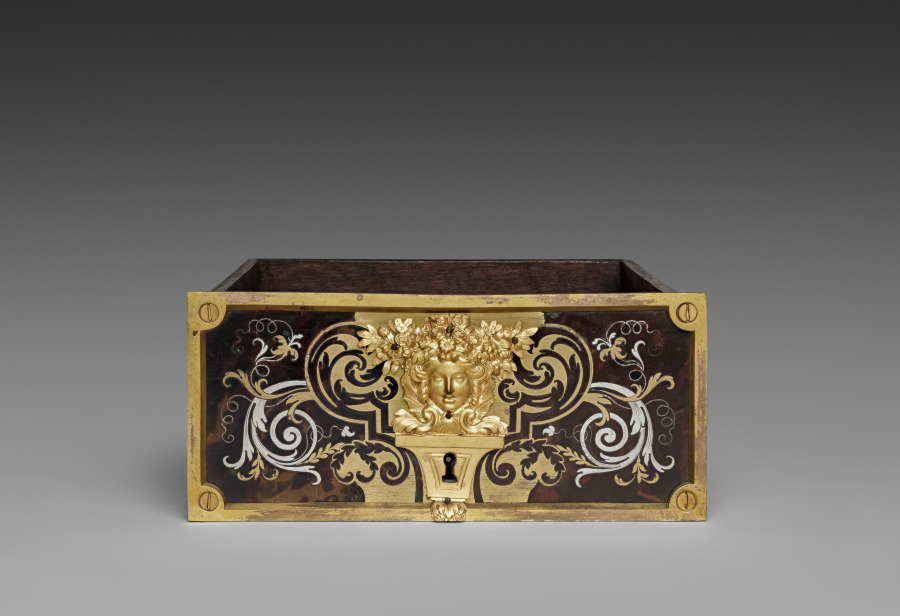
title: Side Drawer for Cabinet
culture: France, late 17th Century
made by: André-Charles Boulle (French, 1642–1732)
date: c. 1690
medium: ebony, marquetry in metal and tortoise shell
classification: Furniture and woodwork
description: Appointed cabinetmaker to King Louis XIV in 1672, André-Charles Boulle became a master of furniture making in France during the late 1600s until his death in 1732. Known primarily for his use of marquetry, in which metal patterns are inlaid into tortoiseshell then applied within the veneered surface of the furniture, Boulle established a level of quality and craftsmanship few others could achieve. As a result, his work found favor at the royal court and among other aristocrats and diplomats eager to impress the king. The inclusion of a medallion depicting Louis XIV within the bronze decoration of this chest would have identified the owner with the royal court. Often exhibiting stout architectural proportions with elegant groups of inlaid motifs such as the parrot on the central panel of this chest, Boulle’s designs are an example of the intellectual fashion for contrasting ideas, materials, and motifs.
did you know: Originally designed to sit atop an elaborate tall stand, this chest was likely altered in the late 1700s to reduce its scale and height.